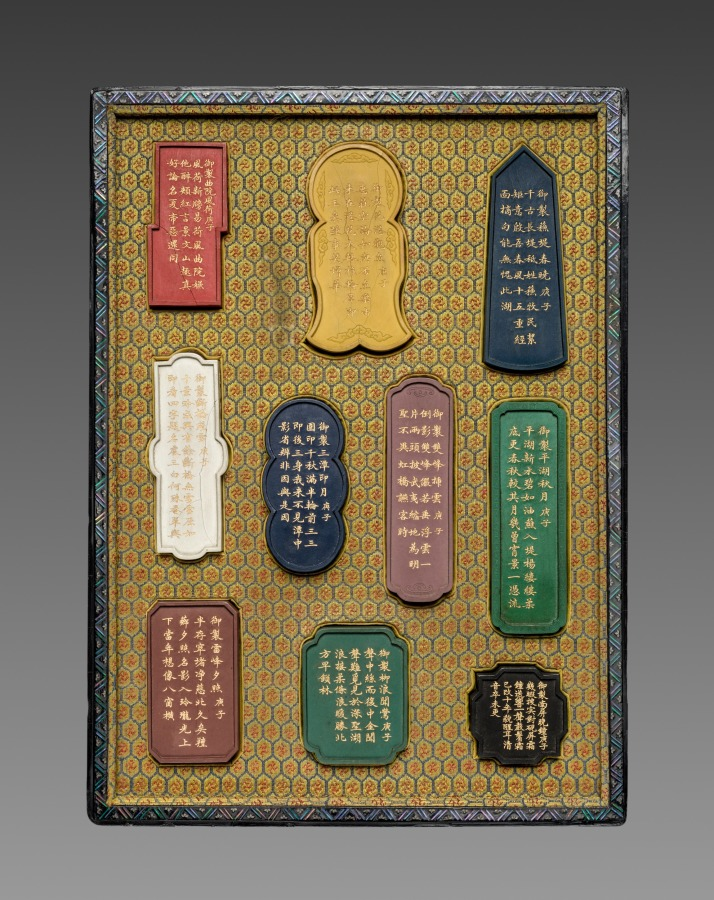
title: Imperially Commissioned Set of Ink Sticks with Images and Poems of Famous West Lake Sites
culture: China, Qing dynasty (1644–1911), Qianlong reign (1736–95)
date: 1780–94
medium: Molded ink in yellow, blue, black, green, red, brown, white, and gold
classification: Miscellaneous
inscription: 乾隆年製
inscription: The inscription in mother of pearl inlay on the box’s cover says: Imperially Made Gold Inscribed Poems of Images of [the Ten] Sights of the Westlake.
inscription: The poems on the ink sticks are published in Yuzhi shiji 御製詩集 [Collection of imperial poetry], vol. 4, juan 71, 6b–8b; and Qinding nanzun shengdian 欽定南巡盛典 [Grand ritual of the southern tour], juan 17, 17b–28b.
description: Each ink stick depicts one of the Ten Scenes of the West Lake on one side, and a corresponding imperial poem on the other, composed on emperor Qianlong’s fifth southern inspection tour in 1780. Notably, the ink sticks’ colors and shapes correspond with the poems’ respective content. An inscription on one ink stick identifies this set as a gift to the emperor by Jiang Lan, an official from Anhui, a province known for its excellence in ink, paper making, and printing. Imperial records note that 10 more sets of West Lake inks were presented as a tribute by Gioroi Giking (Chinese: Jueluo Jiqing, 1753–1802), a Zhejiang provincial governor and a bannerman (Manchu native).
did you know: The inscription in mother-of-pearl inlay on the box’s cover says: Imperially Made Gold Inscribed Poems of Images of [the Ten] Sights of the Westlake.